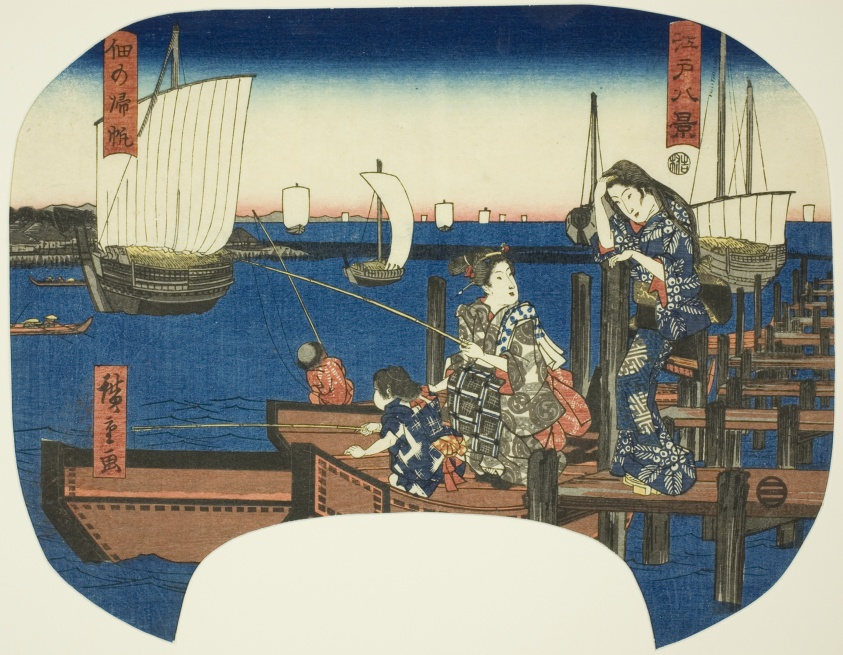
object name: Print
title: Returning Sails at Tsukuda (Tsukuda no kihan), from the series "Eight Views of Edo (Edo hakkei)"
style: Japanese (culture or style)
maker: Utagawa Hiroshige 歌川 広重; Japanese, 1797-1858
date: c. 1844/46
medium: Color woodblock print; uchiwa-e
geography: Japan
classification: woodblock print; print; asian art